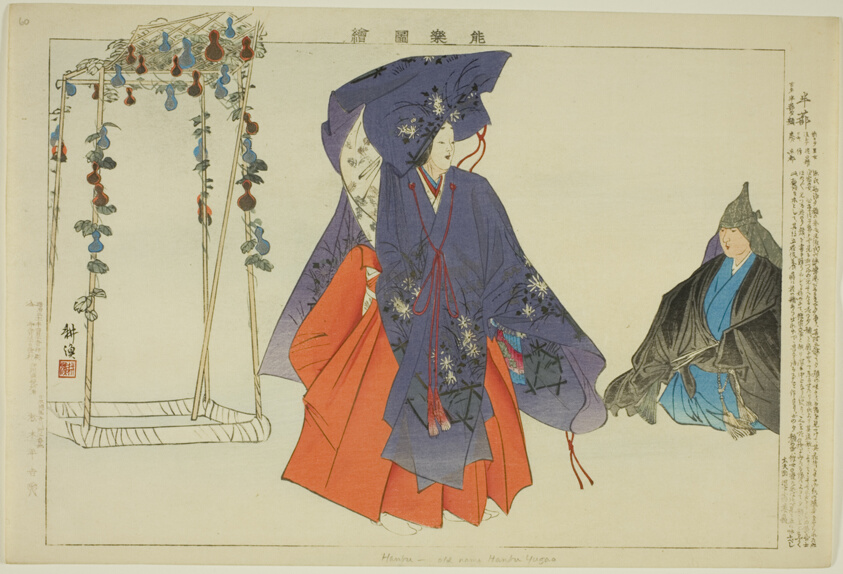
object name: Print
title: Hanbu, from the series "Pictures of No Performances (Nogaku Zue)"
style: Japanese (culture or style)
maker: Tsukioka Kogyo; Japanese, 1869-1927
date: 1898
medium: Color woodblock print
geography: Japan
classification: woodblock print; print; asian art